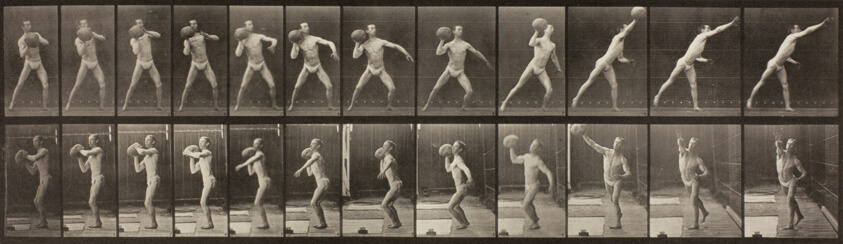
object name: Photograph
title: Animal Locomotion, Plate 319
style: 19th century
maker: Eadweard Muybridge (English, active United States, 1830–1904)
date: 1887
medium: Collotype, from "Animal Locomotion"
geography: England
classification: photograph; collotype; photography